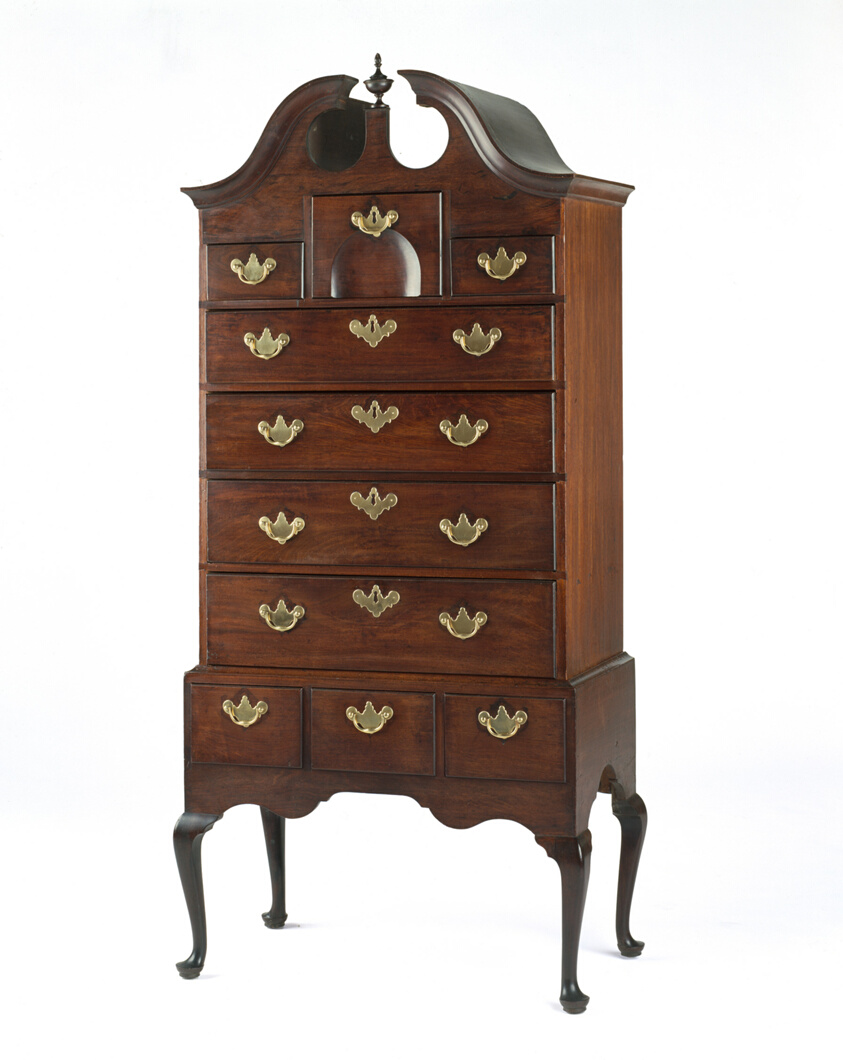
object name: Furniture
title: High Chest of Drawers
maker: Artist unknown (American, 18th century); North shore of Massachusetts, possibly Salem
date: 1750–70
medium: Mahogany with white pine, cedar, and brass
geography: Salem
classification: case furniture; furniture; american decorative arts; american arts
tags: furniture